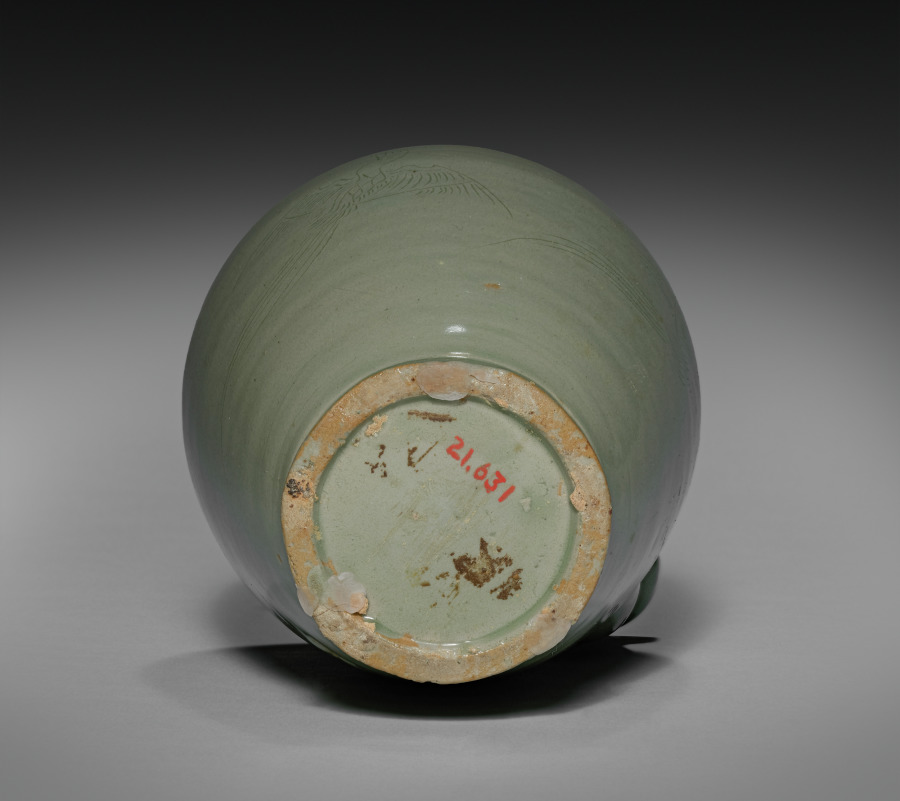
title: Water Ewer for Rituals with Incised Parrot Design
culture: Korea, Goryeo dynasty (918–1392)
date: 1100s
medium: stoneware with celadon glaze, incised and carved decoration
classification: Ceramic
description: This distinctively shaped celadon vessel is a kundika. With a spout on one side, this type of vessel is often used in Buddhist purification rituals. Unlike most existing examples that have an image of a willow tree, this work has a rare flying phoenix design incised on its surface.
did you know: This distinctively shaped vessel is called a kundika in Sanskrit, simply referring to a water bottle.